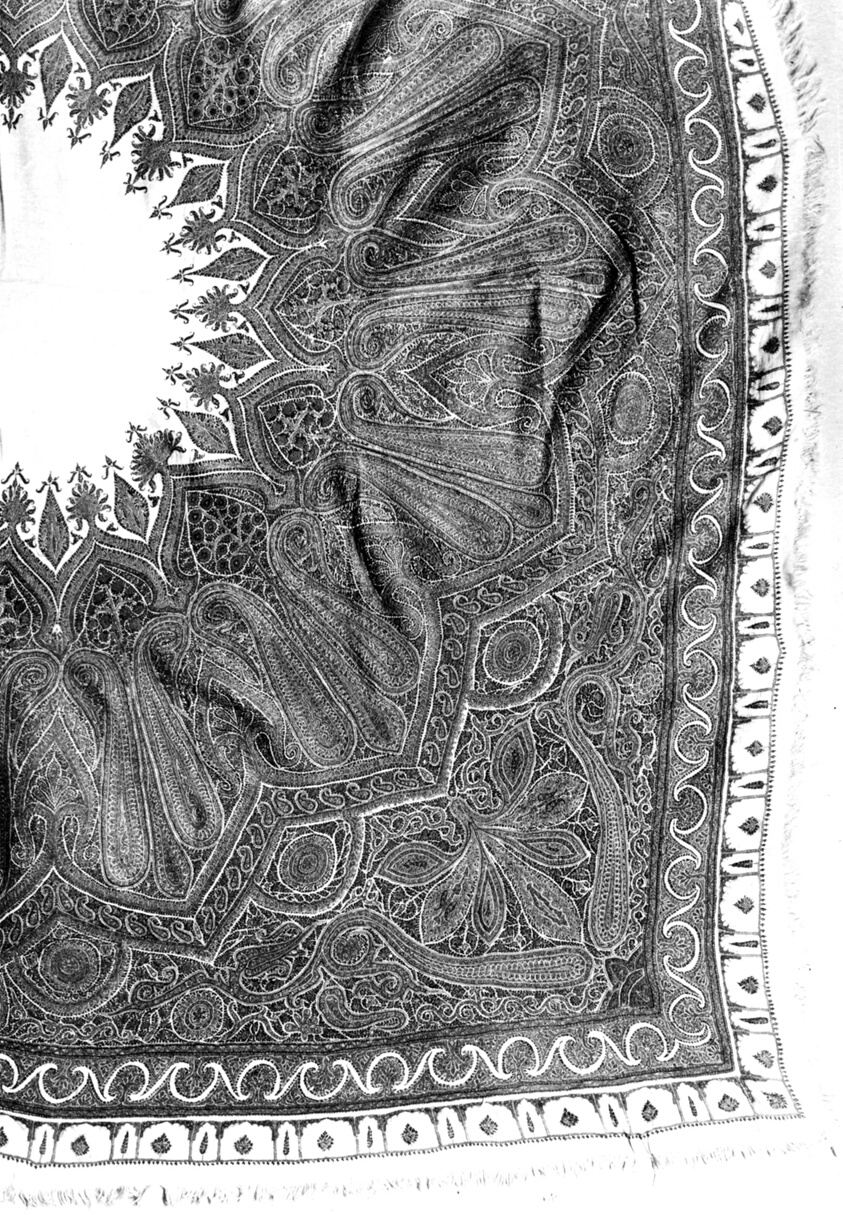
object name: Costume and Accessories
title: Shawl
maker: India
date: 1846/77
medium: wool, 2:2 'S' twill weaves; pieced; embroidered with wool in stem, detached chain, and various filling stitches; laid work and couching; warp fringe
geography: India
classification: textile; weaving; costume; dress (garment); clothing